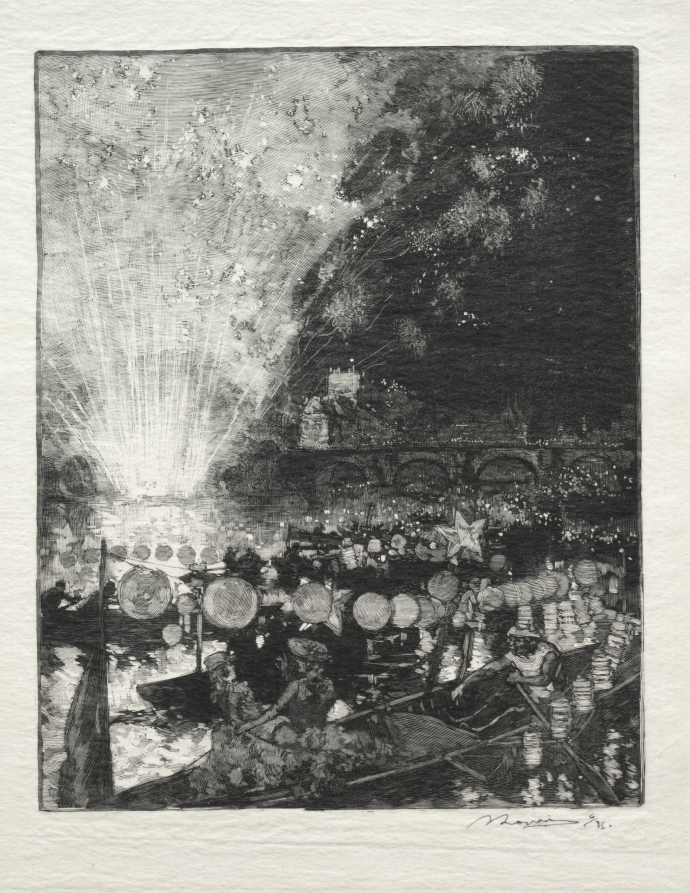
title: Fête Venitienne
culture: France, 19th-20th century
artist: Auguste Louis Lepère (French, 1849–1918)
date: 1889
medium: wood engraving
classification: Print